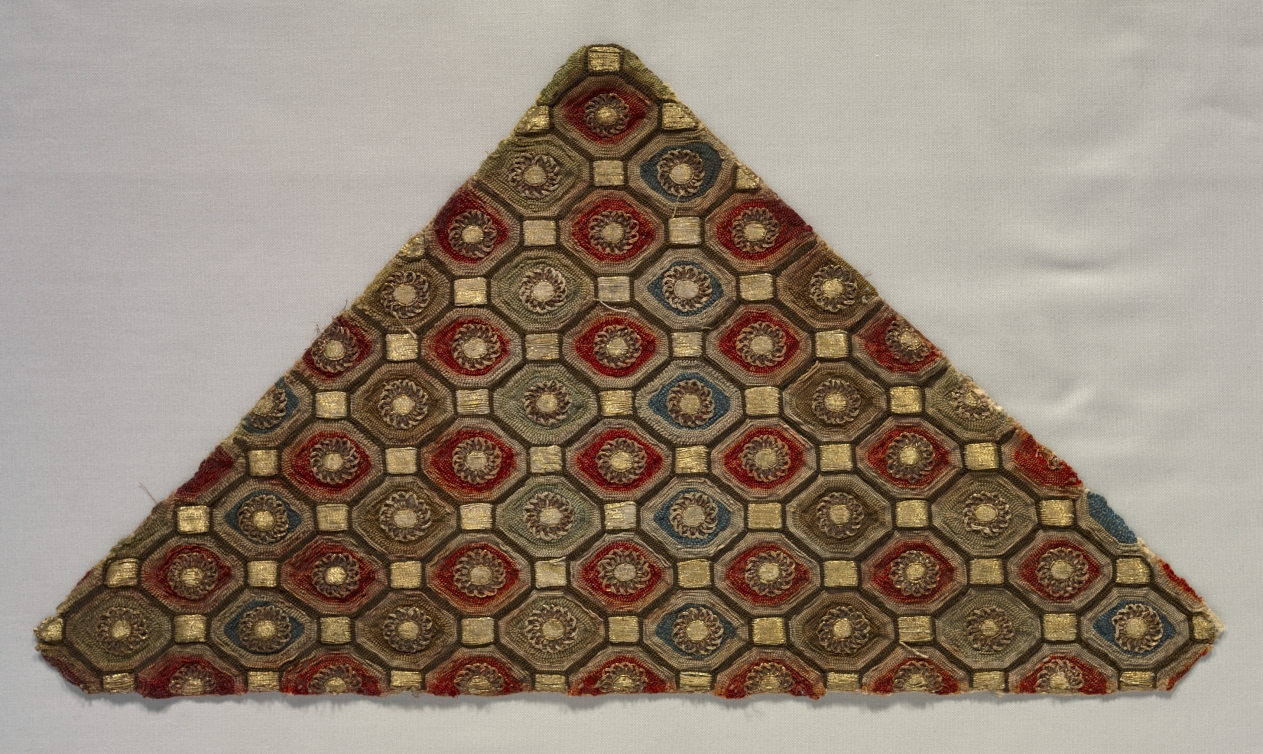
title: Triangular Textile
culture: Unassigned, 19th century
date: 19th century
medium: Embroidery with metal thread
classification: Embroidery